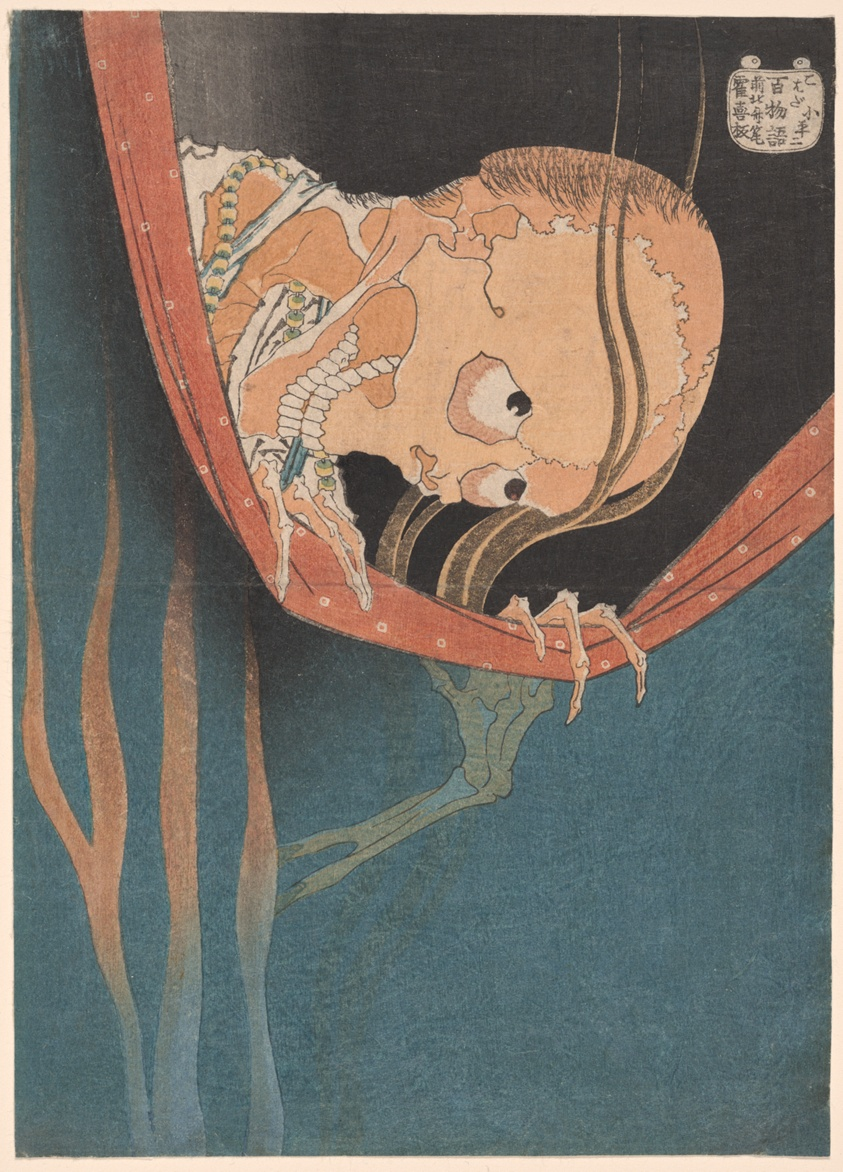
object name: Print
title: Kohada Koheiji, from the series "One Hundred Ghost Tales (Hyaku monogatari)"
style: Japanese (culture or style)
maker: Katsushika Hokusai 葛飾 北斎 (Japanese, 1760-1849)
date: 1831-32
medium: Color woodblock print; chuban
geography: Japan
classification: woodblock print; print; asian art